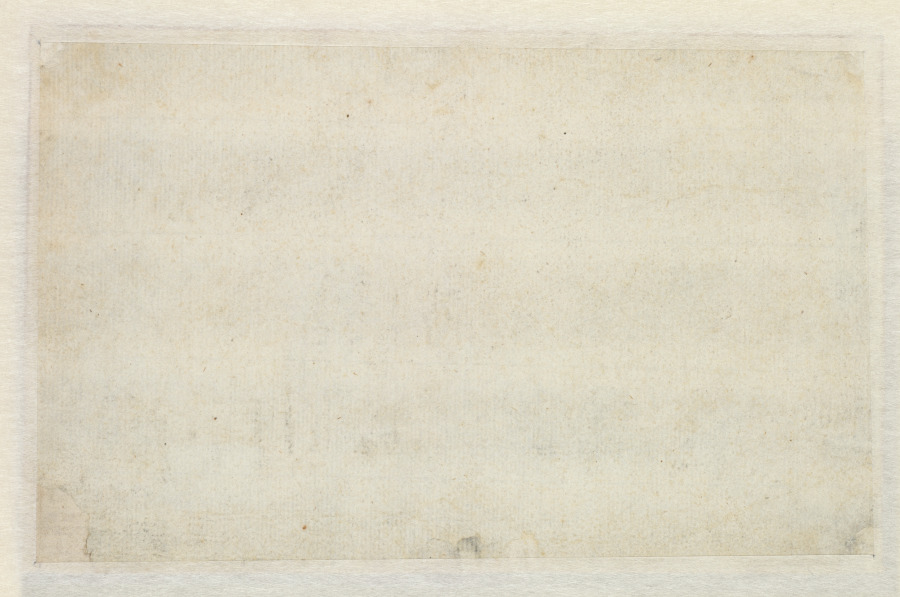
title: Village on a River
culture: Netherlands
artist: Jan Jansz den Uyl (Dutch, 1595/96–1639/40)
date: 1620–25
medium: black chalk, with transparent and opaque watercolor in blue, green-blue, gray, and ochre, framing line in brown ink on antique laid paper; framing line in brown ink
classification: Drawing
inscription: partial watermark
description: This small sheet by Jan Jansz. den Uyl shows the Amsterdam artist recording a scene that he probably encountered during a walk outside the city. Once back in his studio, he embellished the view with watercolors in blue, green, gray, and ochre. In the 1620s, when this was made, sketching landscape scenes on-site was still relatively new in the Netherlands. The drawing does not relate to any known work by Den Uyl, who was a noted still life painter, and he probably made it for his own pleasure.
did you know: In the 1620s, when this small drawing was made, sketching landscape scenes en plein air (on-site) was still relatively new in the Netherlands.